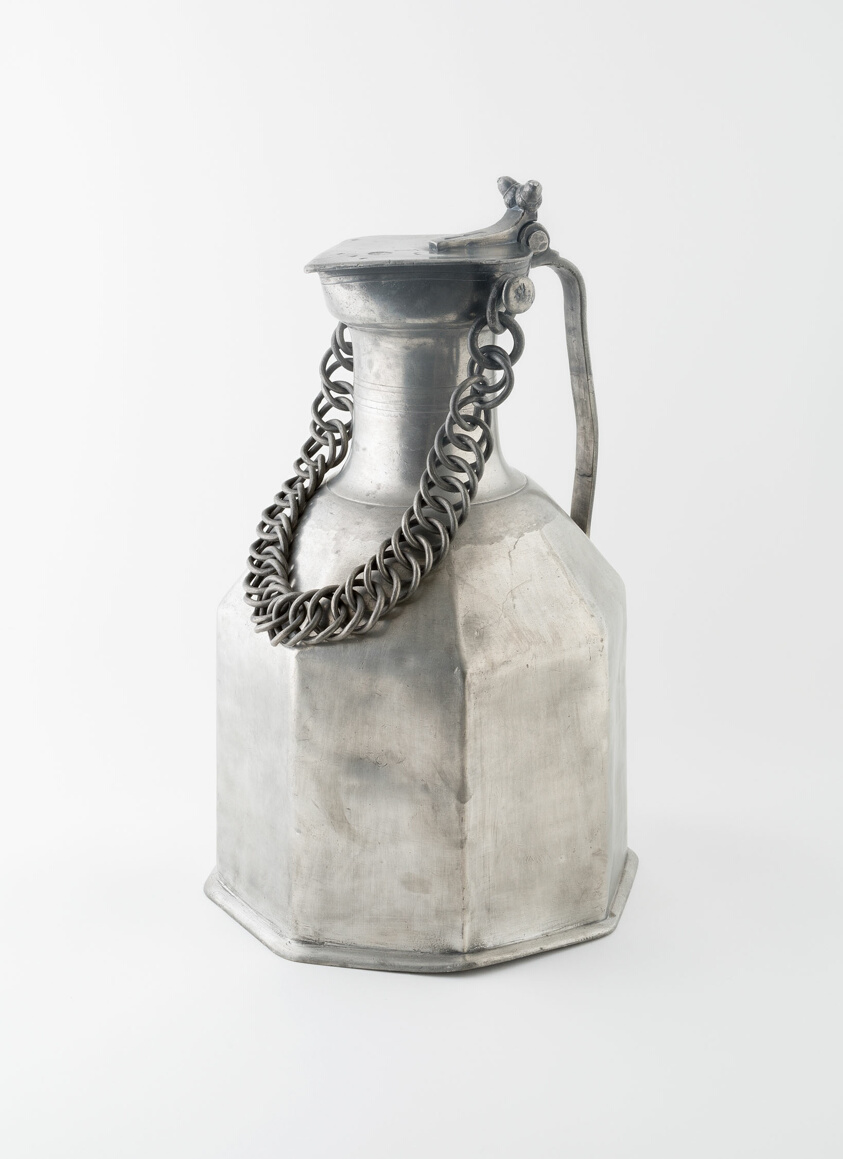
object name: Metalwork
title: Covered Flagon with Chain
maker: Pierre Main; Swiss, active 1716- c. 1750; Switzerland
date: c. 1750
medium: Pewter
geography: Valais canton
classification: pewter; metalwork; european decorative arts